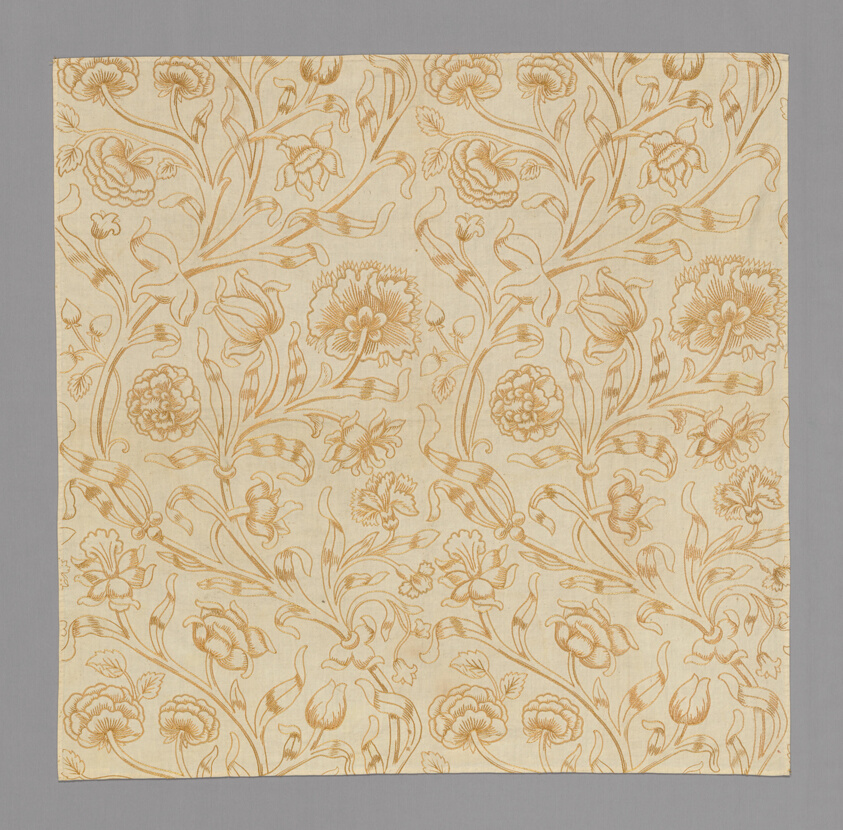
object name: Textile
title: Panel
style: Arts and Crafts Movement, british, 19th century, British Arts and Crafts Movement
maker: Possibly produced for Liberty & Co., London (English, founded 1875); Wardle & Co., Bridgnorth (English, 1875-1930)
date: Design c. 1894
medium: Cotton, plain weave; block printed; embroidered with silk in buttonhole and stem stitches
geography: England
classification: textile; weaving - printed; needlework (visual works)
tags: botanical, foliage, floral